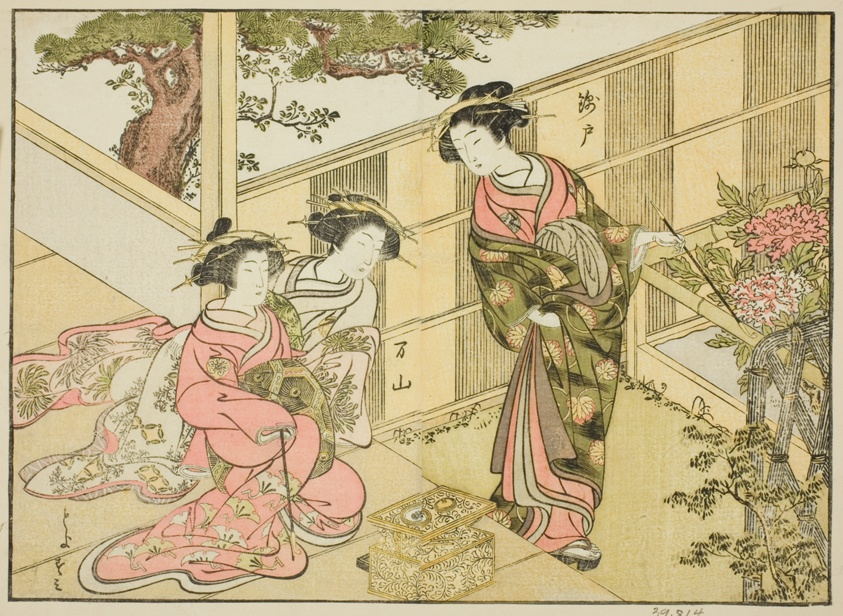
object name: Print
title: Courtesans of the Chojiya, from the book "A Comparison of Beauties of the Green Houses: A Mirror of Their Forms (Seiro bijin awase sugata kagami)," vol. 1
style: Japanese (culture or style)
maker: Katsukawa Shunsho; Japanese, 1726-1792; Kitao Shigemasa; Japanese, 1739-1820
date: 1776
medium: Color woodblock print; double-page illustration cut from a book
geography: Japan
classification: woodblock print; print; asian art